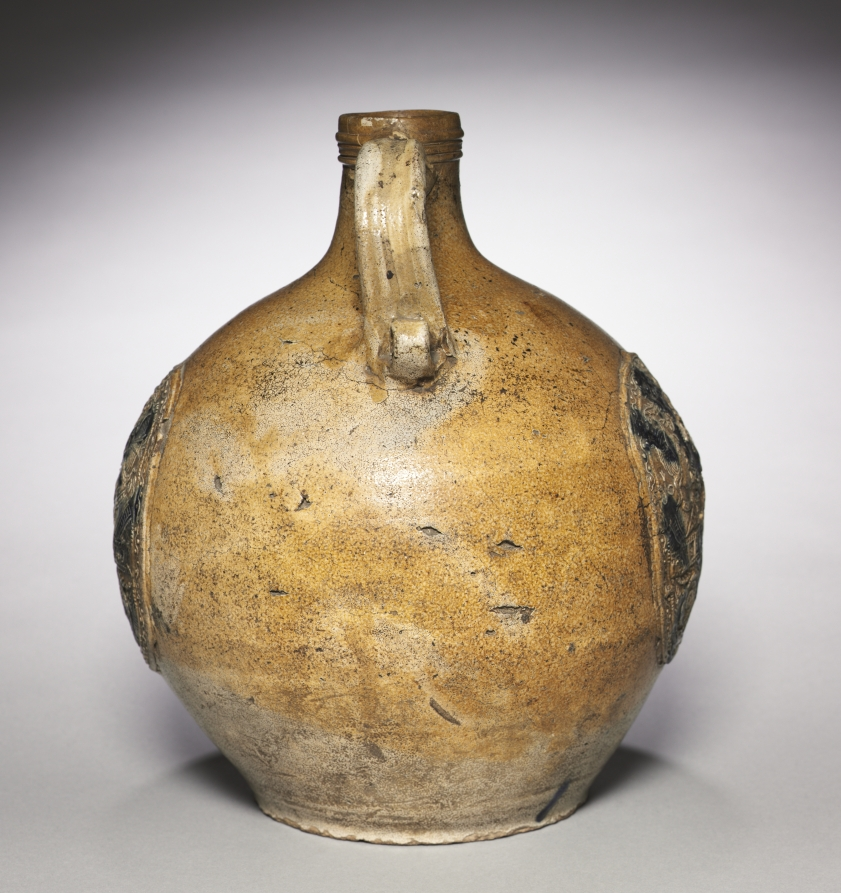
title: Jug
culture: Germany, Frechen, 17th century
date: 1608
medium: salt-glazed stoneware with applied and impressed decoration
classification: Ceramic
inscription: above the shield: 1608.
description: These globular jugs decorated with bearded masks on their necks represent an important type of Rhenish stoneware made from the 1400s onward. They were named "Bartmann" (Bearded Man) or "Bellarmine" jugs. The latter was a reference to Cardinal Bellarmine (1542–1621)—hated in Germany for his Counter-Reformational zeal—because of his supposed resemblance to the bearded images on these vessels. This jug bears the arms of the Pallant van Culemborg family of Gelders. The production and export of German stoneware reached its peak in the late 1500s. Prized for its durability and stone-like appearance, German stoneware became one of the most widely traded forms of pottery, even finding popularity in early America. The distinctive pebbly glass surface, resembling an orange peel, was achieved by introducing salt into the hot kiln during the firing process. This glaze gave clear definition to the coats of arms or other emblems that often formed the surface decoration on large works, usually jugs.